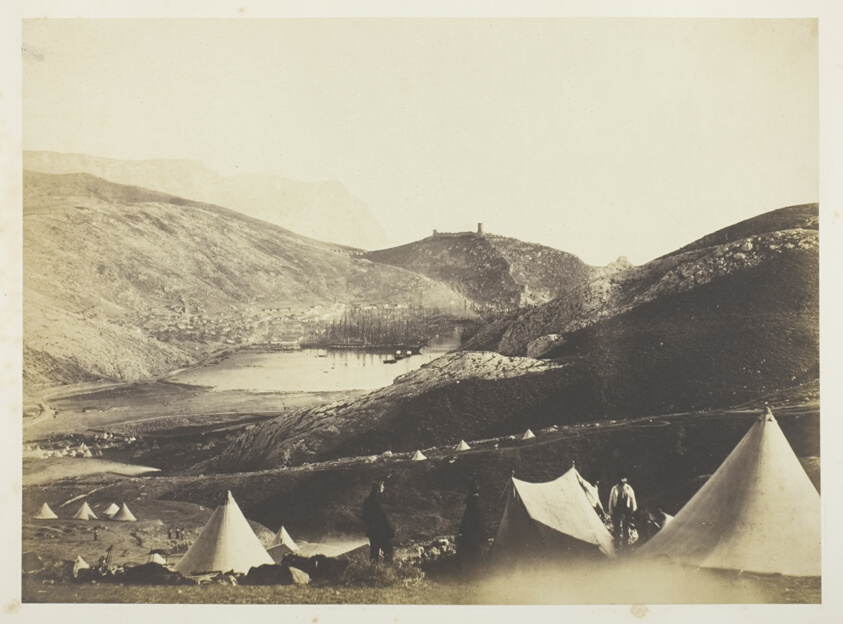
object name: Photograph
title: Balaklava, from Guard's Hill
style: 19th century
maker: Roger Fenton (English, 1819–1869)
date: 1855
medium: Salted paper print, plate 15 from the album "Photographs Taken in the Crimea" (1856)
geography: England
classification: salted paper print; photographic process; photography; photograph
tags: Collected by Hugh Edwards, Crimea 1856